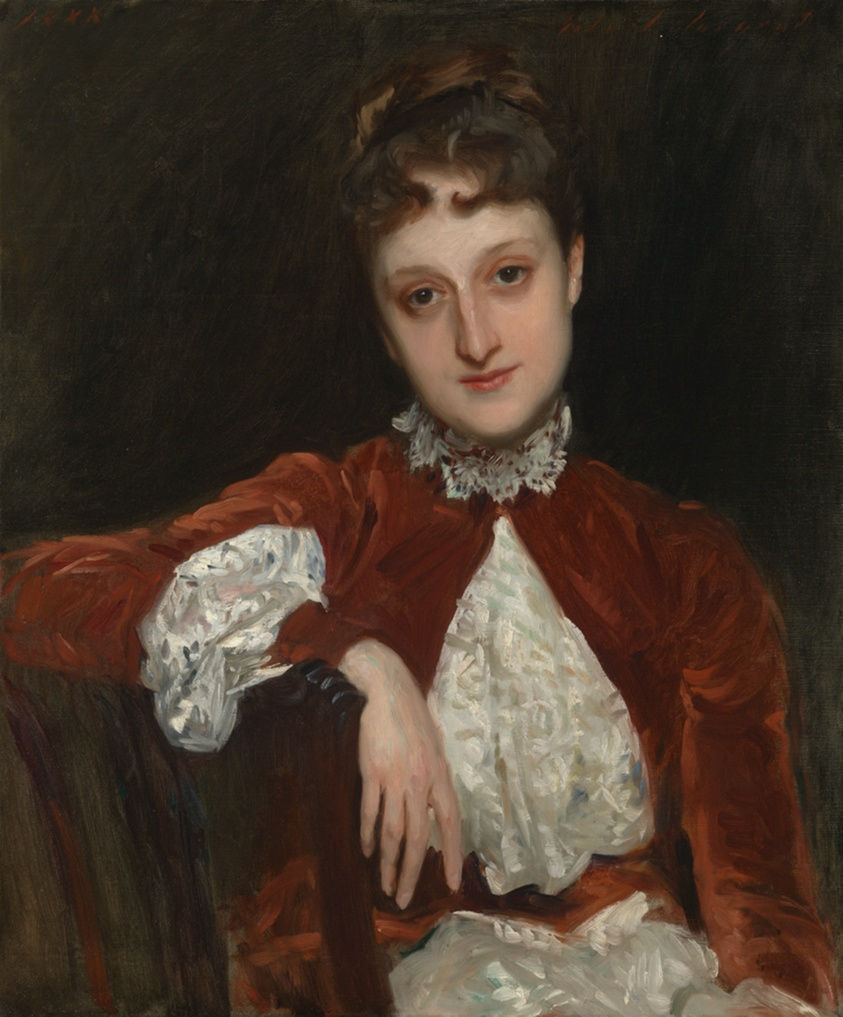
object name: Painting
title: Mrs. Charles Deering (Marion Denison Whipple)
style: Impressionism, Realism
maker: John Singer Sargent (American, 1856–1925)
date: 1888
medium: Oil on canvas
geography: United States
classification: painting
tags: Chicago, people, portraits